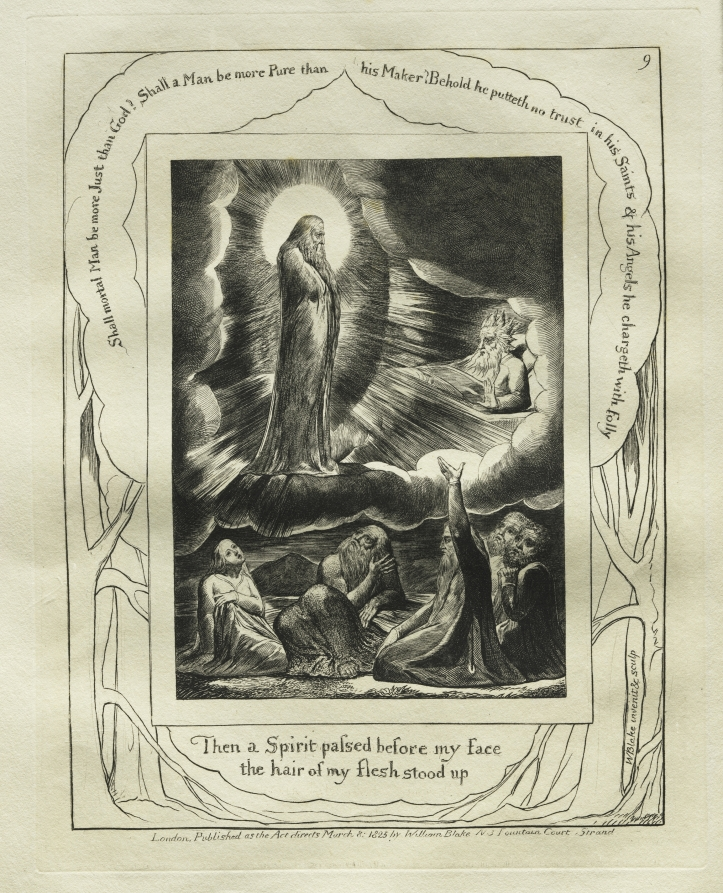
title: The Book of Job: Pl. 9, Then a Spirit passed before my face / the hair of my flesh stood up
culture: England, 19th century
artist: William Blake (British, 1757–1827)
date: 1825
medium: engraving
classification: Print